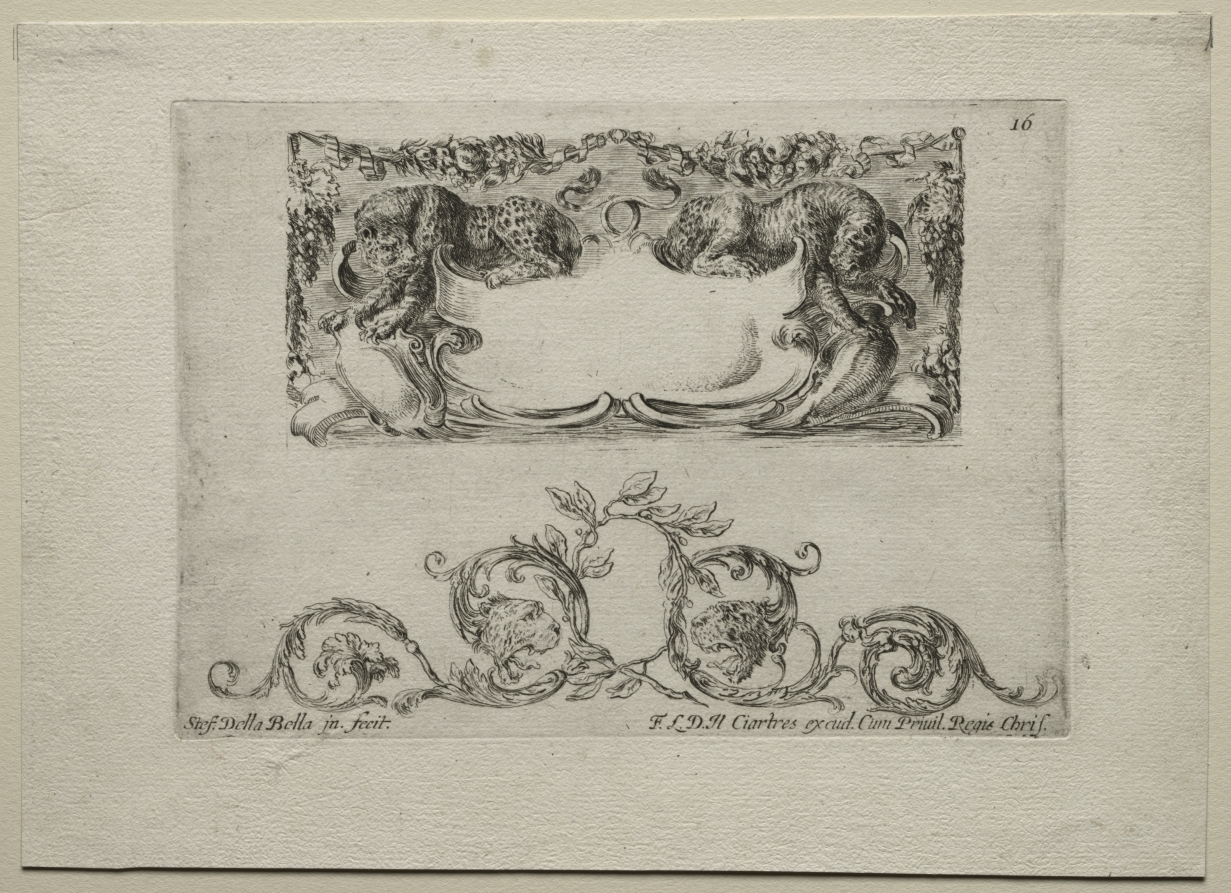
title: Collection of Various Caprices and New Designs of Cartouches and Ornaments: No 16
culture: Italy, 17th century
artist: Stefano Della Bella (Italian, 1610–1664)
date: 1646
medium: etching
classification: Print